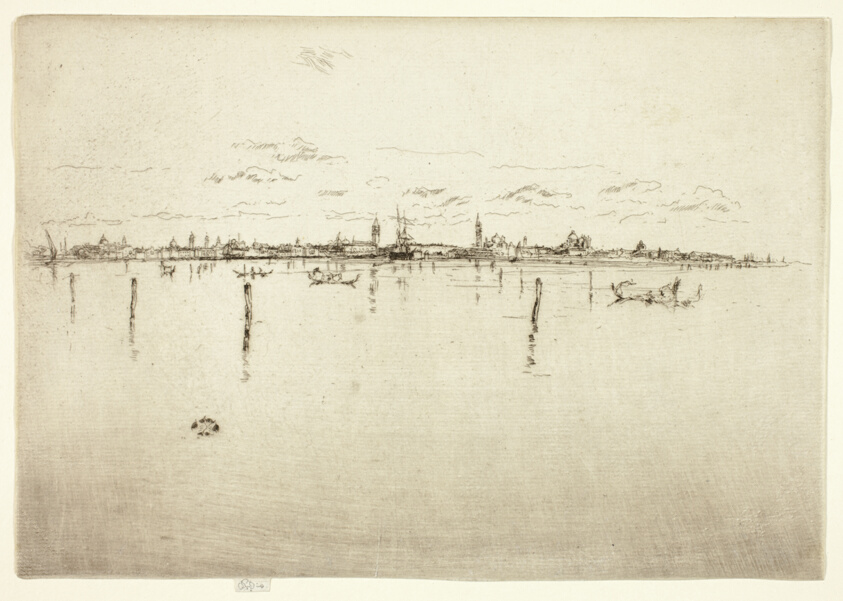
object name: Print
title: The Little Venice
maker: James McNeill Whistler (American, 1834-1903)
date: 1880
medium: Etching in warm black, with selective wiping of plate tone, on ivory laid paper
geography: United States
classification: etching; print; prints and drawing; paper